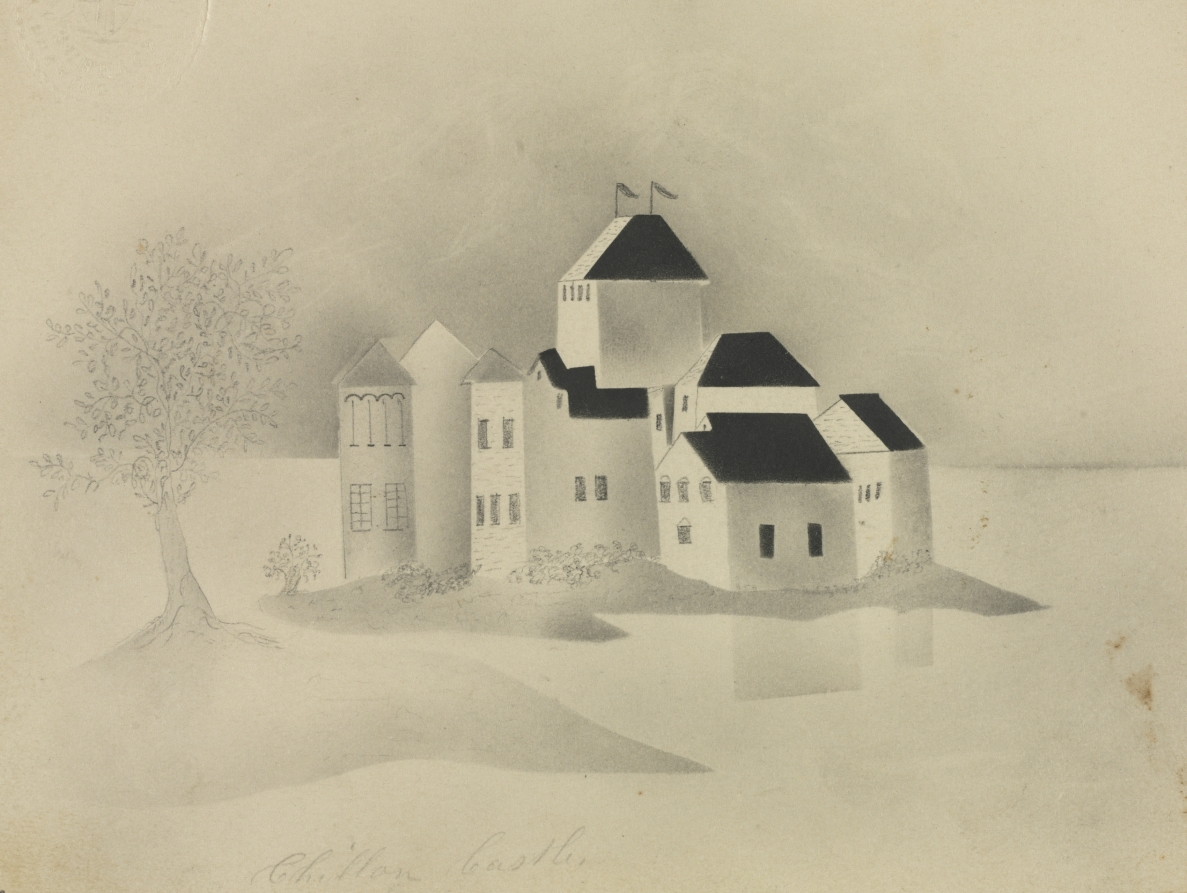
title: Chillon Castle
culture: America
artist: Mary Altha Nims (American, 1817–1907)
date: 1800s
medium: pencil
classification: Drawing